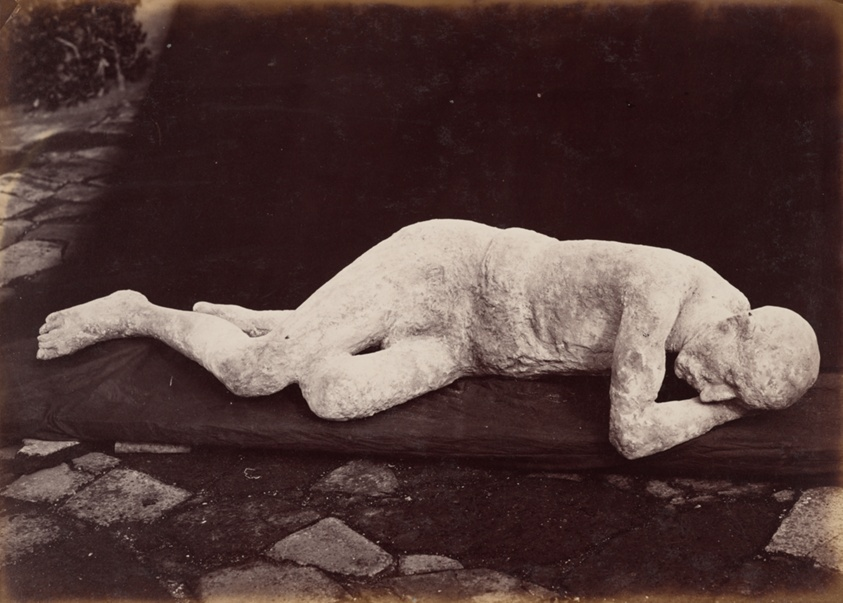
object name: Photograph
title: Plaster Cast of Body, Pompeii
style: 19th century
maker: Giorgio Sommer (Italian, 1834–1914)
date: 1880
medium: Albumen print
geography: Italy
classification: photograph; albumen silver print; photography